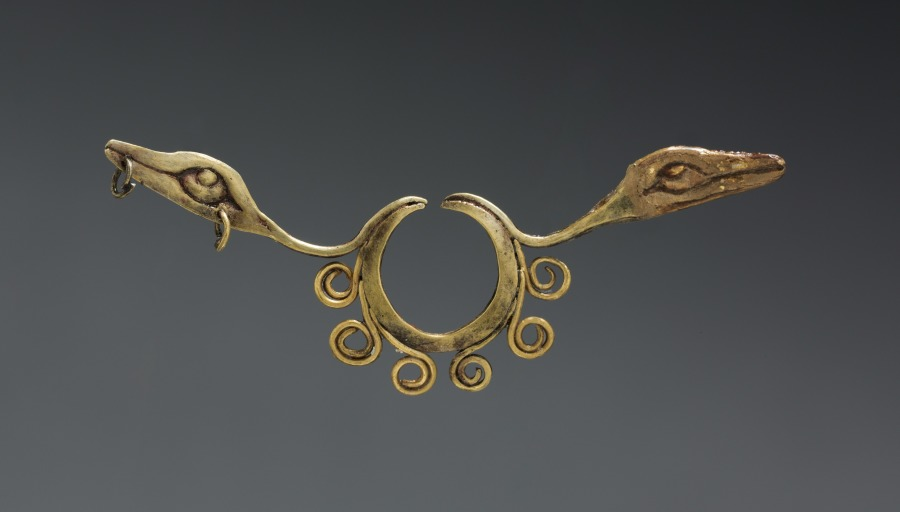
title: Nose Ornament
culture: Peru, North Highlands, Chavín de Huantar(?), Chavín style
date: c. 500–200 BCE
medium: hammered and cut gold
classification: Metalwork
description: There seems to be a link between Chavín religion and appearance of the Andes’ first large precious-metal objects, made using revolutionary new metallurgical processes. Chavín may have developed these technical innovations to express the inexpressible, the "wholly other" nature of its religion. In many areas, elite men and women wore the ornaments as emblems of their ties to this religion, and eventually were buried with them. These 16 objects, along with three others not in the museum’s collection, are said to have come as a group from Chavín itself.